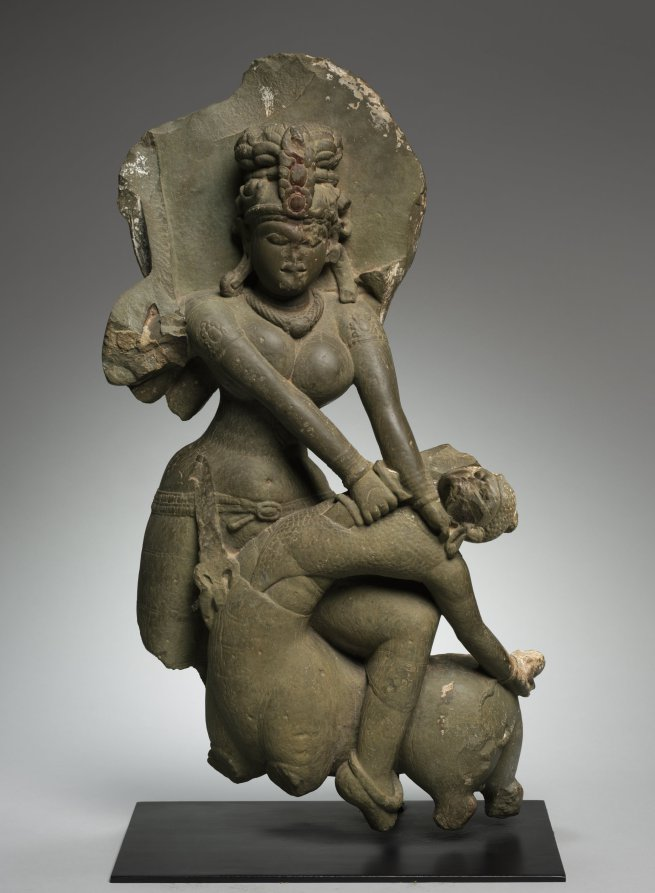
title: Durga Destroying the Buffalo Demon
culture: Northern India, Kashmir or Himachal Pradesh, 9th-10th Century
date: 800s–900s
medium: schist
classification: Sculpture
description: IIn Hindu traditions, the goddess Durga is sometimes understood as a form of Shiva's wife Parvati, the personification of his female energies. This female creative energy, called shakti, has a powerful side that is personified as the warrior goddess Durga, capable of destroying arrogance and other mental vices, personified as the demon. Her main feat in the mythic literature is the slaying of the Buffalo Demon, Mahishasura. He had been ravaging the universe until the warrior goddess Durga decapitated him. His more vulnerable demonic form emerges from the neck, and she, calm but powerful, slays him with her sword.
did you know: She uses Shiva's trident to pin down the demon.